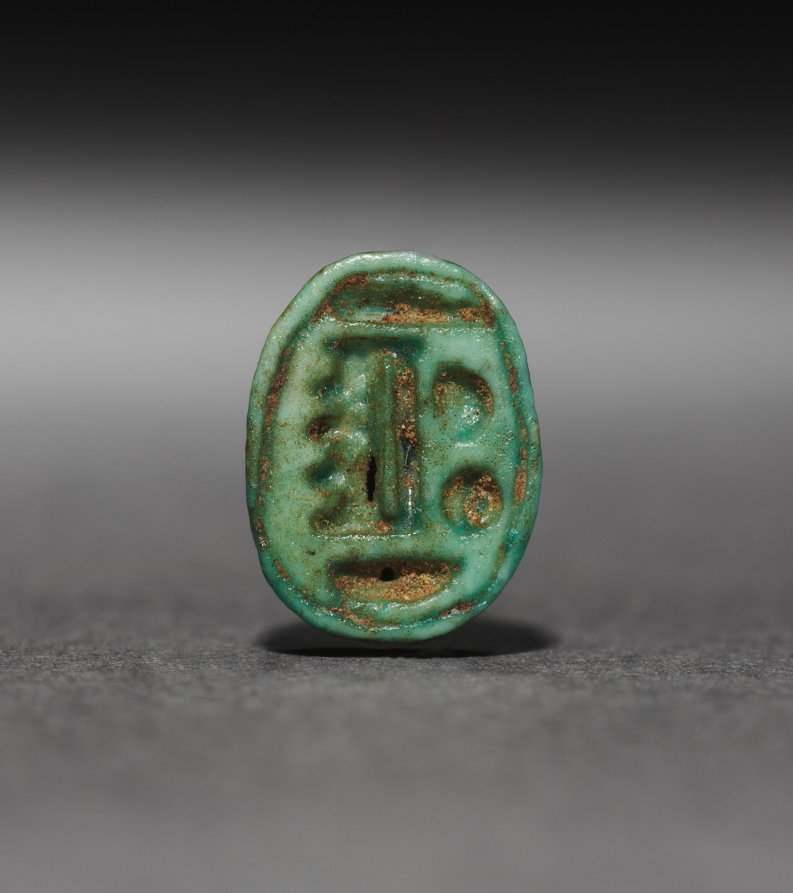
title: Scarab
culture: Egypt, New Kingdom or modern forgery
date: 1550–1077 BCE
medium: glazed steatite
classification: Scarabs